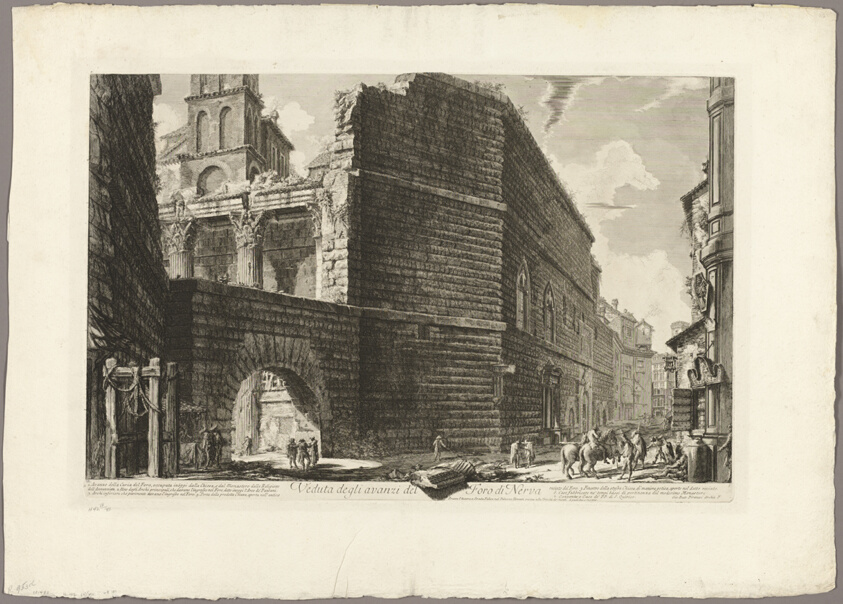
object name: Print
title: View of the Remains of the Forum of Nerva, from Views of Rome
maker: Giovanni Battista Piranesi (Italian, 1720-1778)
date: 1757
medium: Etching on heavy ivory laid paper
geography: Italy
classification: etching; print; prints and drawing